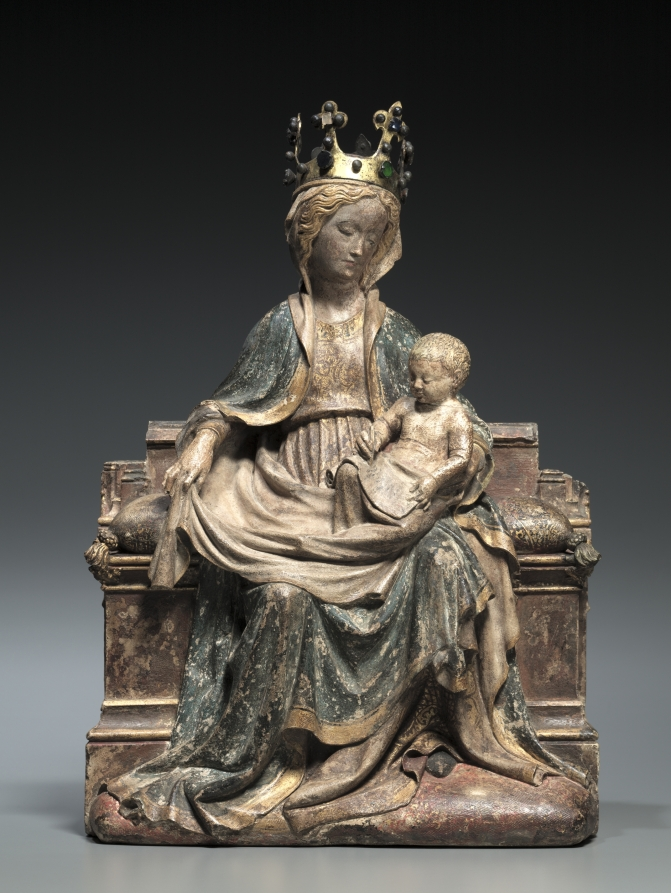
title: Enthroned Virgin with the Writing Christ Child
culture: Franco-Netherlandish, active Paris(?), 15th century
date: c. 1400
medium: limestone with polychromy and gilding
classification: Sculpture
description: This sculpture belongs to a tradition of seated Virgins that were prominent in Netherlandish art in the decades around 1400, and by extension may be associated with the Valois courts at Paris, Dijon, and Bourges. The theme of the Christ child who writes into an open book or onto a vellum banderole emerged during the third quarter of the 14th century and had great appeal among ecclesiastical and aristocratic clients. It undoubtedly refers to the educating and nurturing role of the mother in teaching the child, but also to the future position of the adult Christ as author and teacher. The small scale of this sculpture and the fact that its back is uncarved suggest that it was made for a small alcove or niche, appropriate in the intimate setting of a small chapel or oratory. The sculpture would have primarily been viewed from the front and perhaps from slightly below.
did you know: Here the Virgin is sitting on a highly decorated pillow.